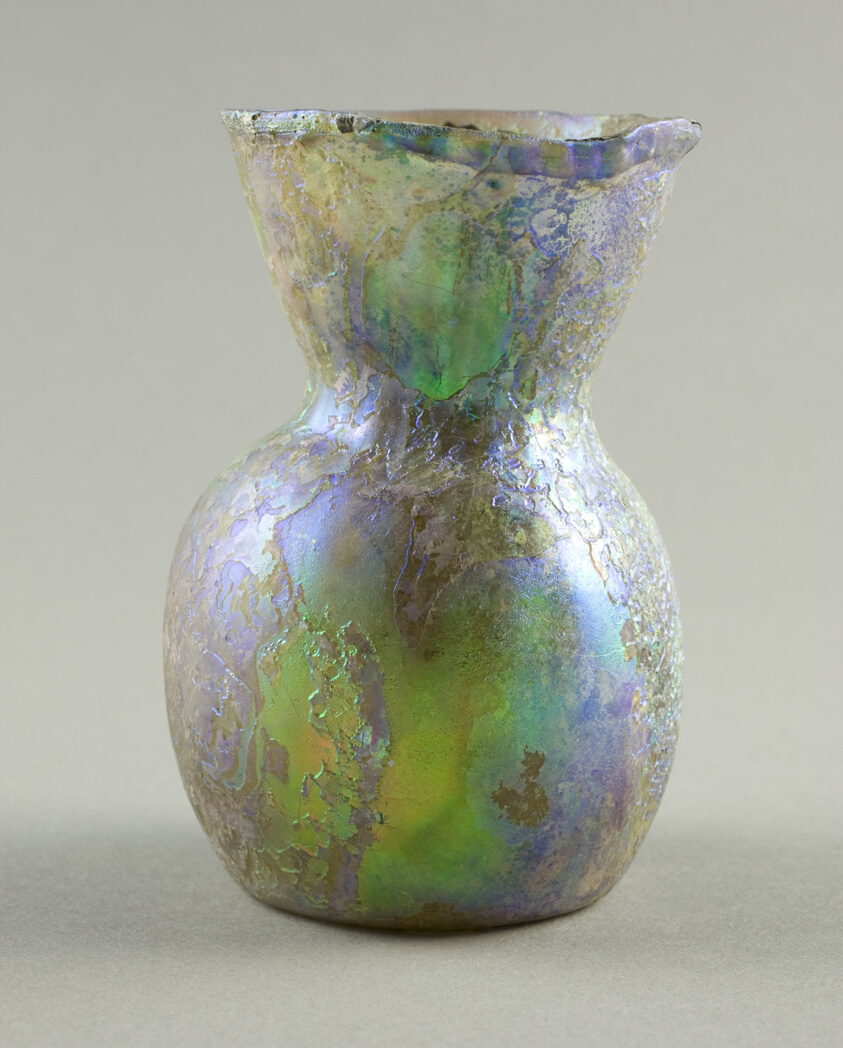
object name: Vessel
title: Vase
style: syrian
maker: Roman; Levant or Syria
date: 1st-5th century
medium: Glass, blown technique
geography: Syria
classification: glass; vessel; ancient art